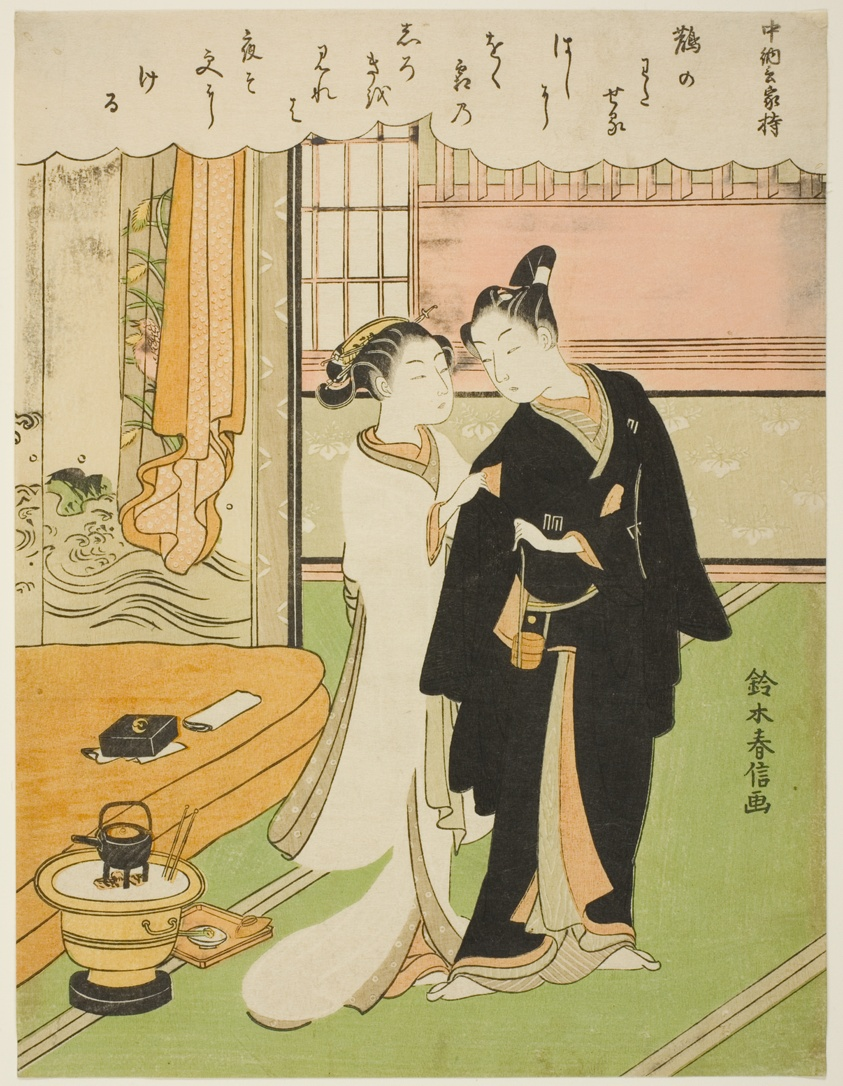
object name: Print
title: Poem by Chunagon Yakamochi, from an untitled series of One Hundred Poems by One Hundred Poets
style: Japanese (culture or style)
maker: Suzuki Harunobu 鈴木 春信; Japanese, 1725 (?)-1770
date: c. 1767/68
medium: Color woodblock print; chuban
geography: Japan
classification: woodblock print; print; asian art